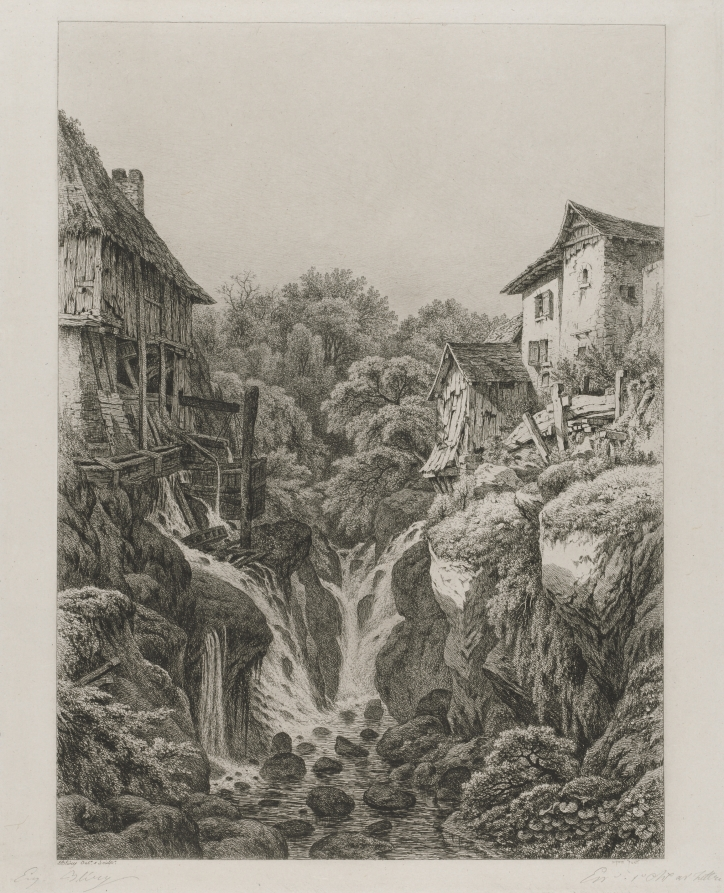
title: The Mill and Waterfall of Grésy near Aix-les-Bains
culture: France, 19th century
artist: Eugene Bléry (French, 1805–1886)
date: 1856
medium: etching on chine collé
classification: Print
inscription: lower left, in pencil: Eug. Blery; lower right, in pencil: ...lettre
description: Bléry worked directly from nature or from his own drawings, and his landscape etchings are meticulous, delicate, and highly wrought. He was deeply influenced by Dutch 17th-century landscapes, particularly those by Meindert Hobbema and Jacob van Ruisdael, both of whom Bléry copied. The Mill and Waterfall of Grésy near Aix-les-Bains is one of the artist’s original compositions and reveals the attention that he lavished on the natural world. The Romantic overtones of this composition are related to numerous German landscapes of the period.